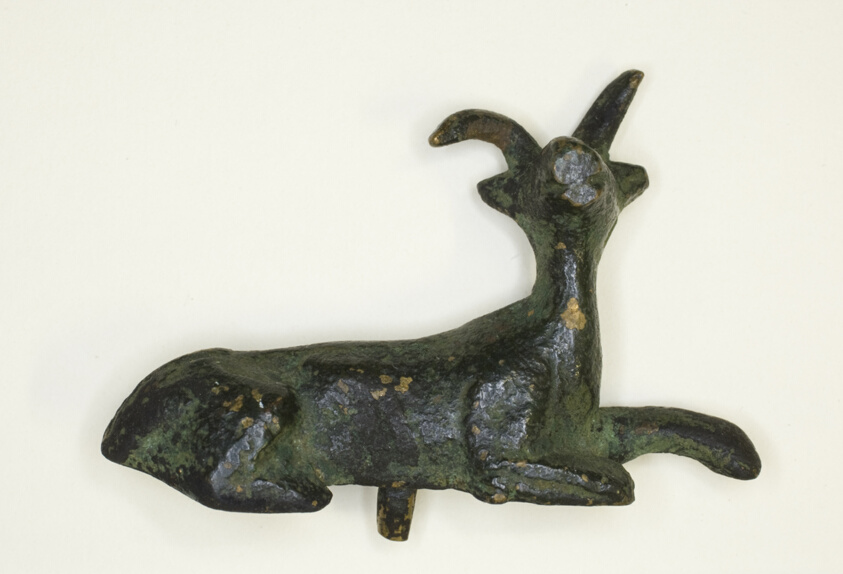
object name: Sculpture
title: Statuette of a Goat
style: etruscan, ancient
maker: Etruscan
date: 5th century BCE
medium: Bronze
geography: Etruria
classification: statuette; bronze; metal; sculpture; ancient art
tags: goats